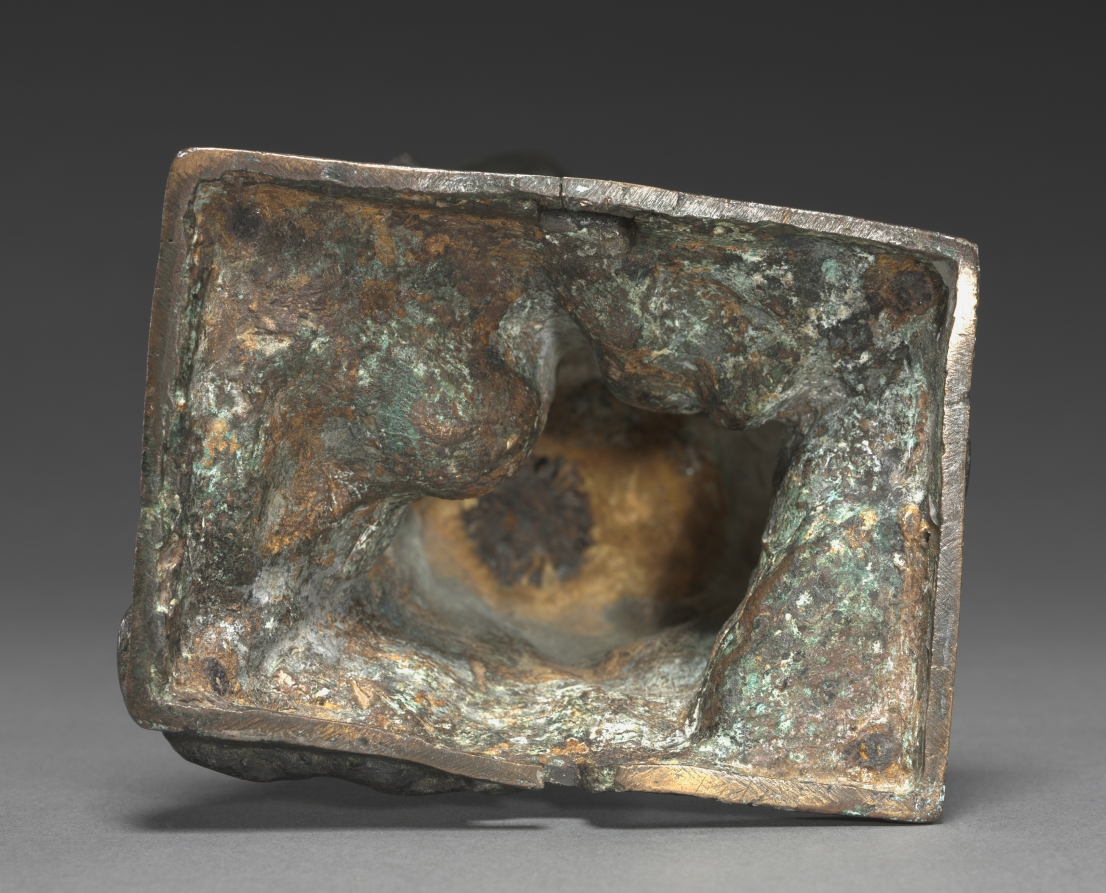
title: Virgin and Child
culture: Italy, 16th century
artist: Jacopo Sansovino (Italian, 1486–1570)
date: early 1530s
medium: bronze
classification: Sculpture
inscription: inscribed across the front of the base: IACOBVS SANSOV.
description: This statue is a scaled-down version of a marble figure the sculptor and architect Jacopo Sansovino carved for the funerary monument of a nobleman in Verona, Italy. Balancing the stable mass of the Virgin with the seemingly weightless, elongated child draped gracefully across her torso, the composition illustrates Sansovino’s skill. After training in Florence, he relocated to Rome before eventually settling in Venice in 1527. Sansovino contributed significantly to public and private projects across the region, from important civic buildings and tomb sculpture to intimately scaled bronzes, such as this example from his early Venetian period.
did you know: Sansovino's signature on the base—uncommon for bronzes of this period—marks this as a work of particular importance.